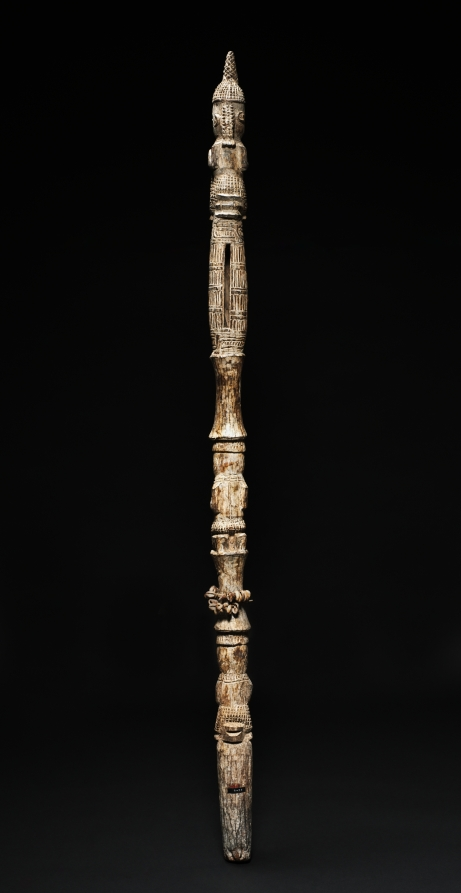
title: Rattle Staff (ukhuhre)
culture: Nigeria, Benin Kingdom, Ẹdo peoples, member(s) of the Igbesanmwan (wood and ivory carvers) guild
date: 1900s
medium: Wood, paint, cowrie shells, and plant fiber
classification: Sculpture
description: Rattle staffs (ukhuhrẹ) are instruments of memory and sound. Though this staff represented a single elite man, it evokes the individuals in his lineage. Inspired by bamboo, it is divided into segments that link three carved men dressed in coral-beaded finery. Benin courtiers still carry these staffs during celebrations and rituals. By banging the staff on the ground, a rattling sound emanates from its open center, where a wooden cylinder rolls freely. The noise alerts ancestral spirits to prayers offered on their behalf. When not in use, they are stored on ancestral altars.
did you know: Rattle staffs (ukhuhrẹ) like this are still used in the Benin Kingdom today.